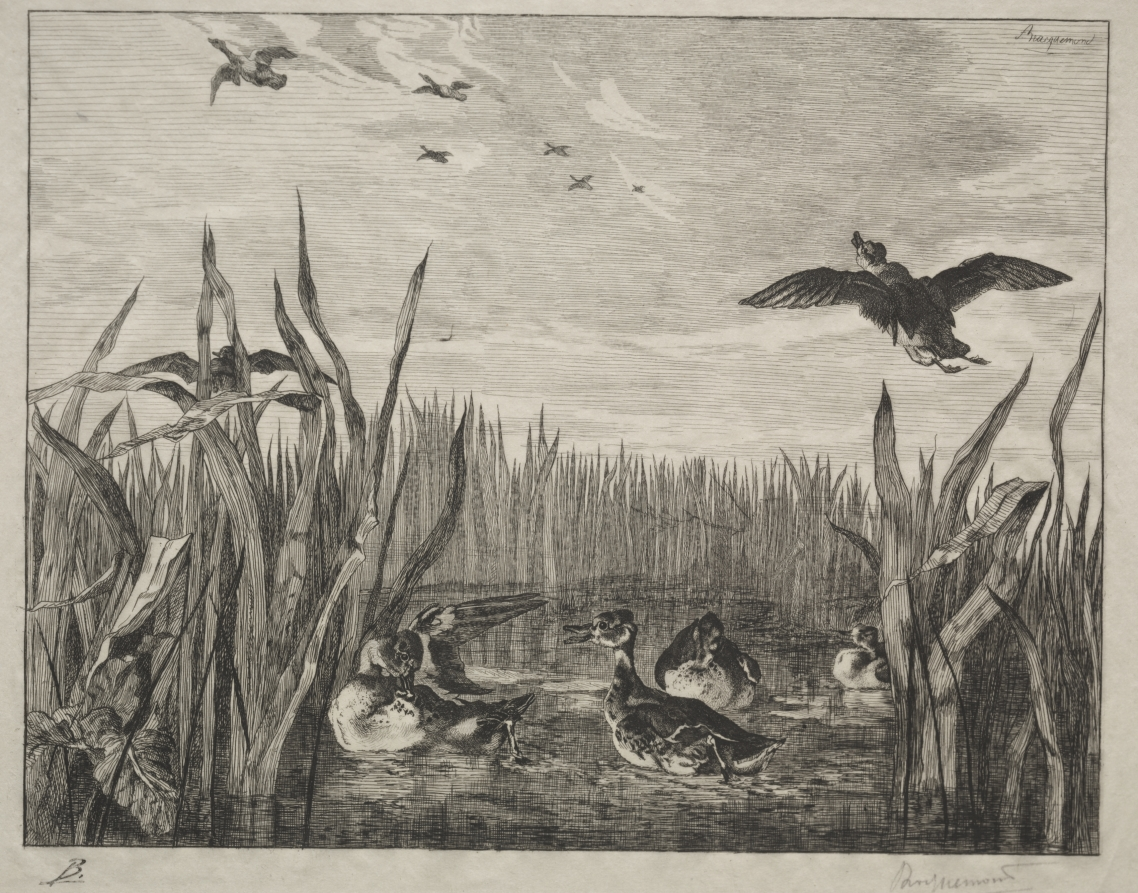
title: Teal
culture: France, 19th-20th Century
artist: Félix Bracquemond (French, 1833–1914)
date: 1853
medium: etching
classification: Print